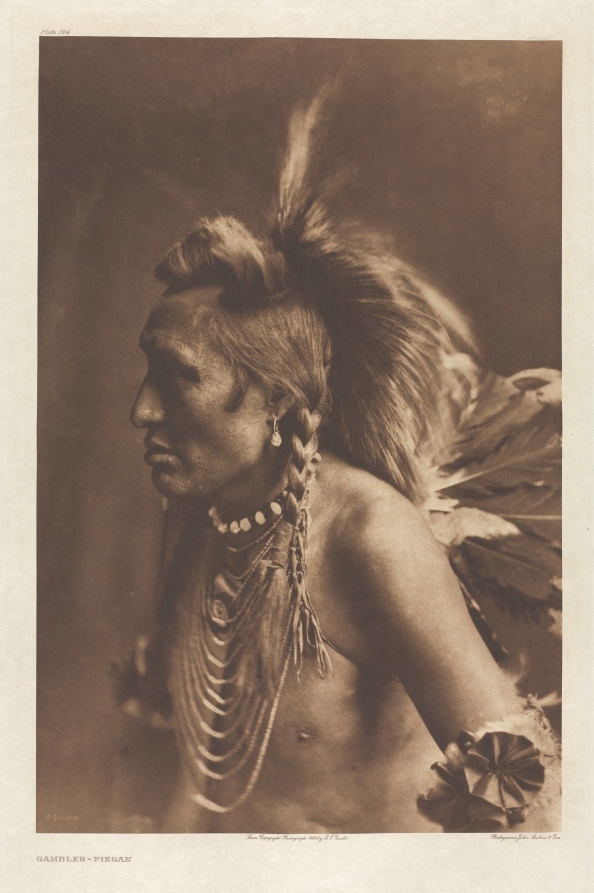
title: Portfolio VI, Plate 194: Gambler--Piegan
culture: America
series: The North American Indian: being a series of Portfolios picturing and describing the Indians of the United States, the Dominion of Canada, and Alaska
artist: Edward S. Curtis (American, 1868–1952)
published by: The University Press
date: 1900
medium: photogravure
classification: Portfolio